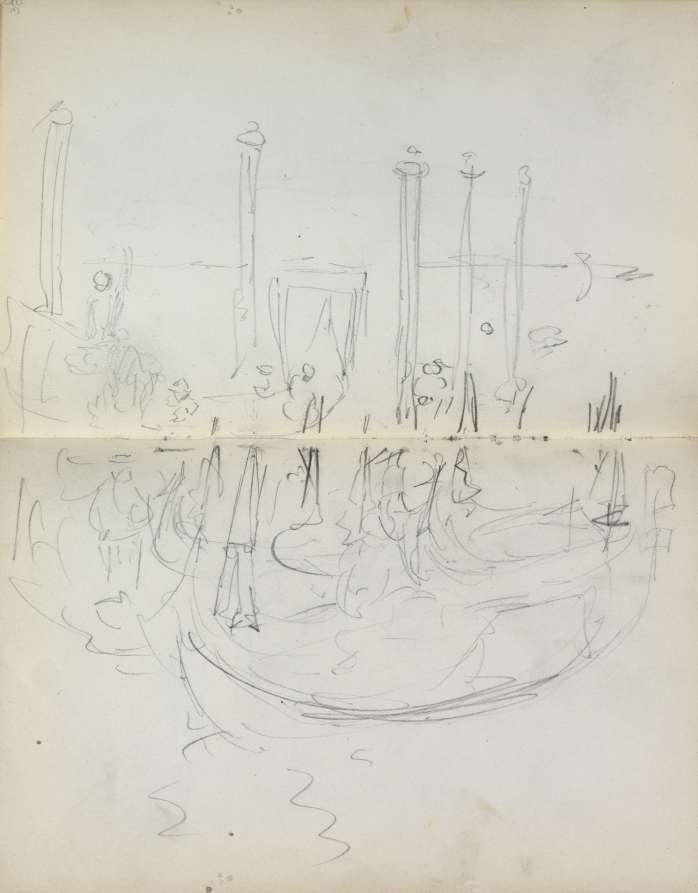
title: Italian Sketchbook: Venetian Harbor View (page 37 & 38)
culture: America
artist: Maurice Prendergast (American, born Newfoundland [now Canada], 1858–1924)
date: 1898–1899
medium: pencil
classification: Bound Volume